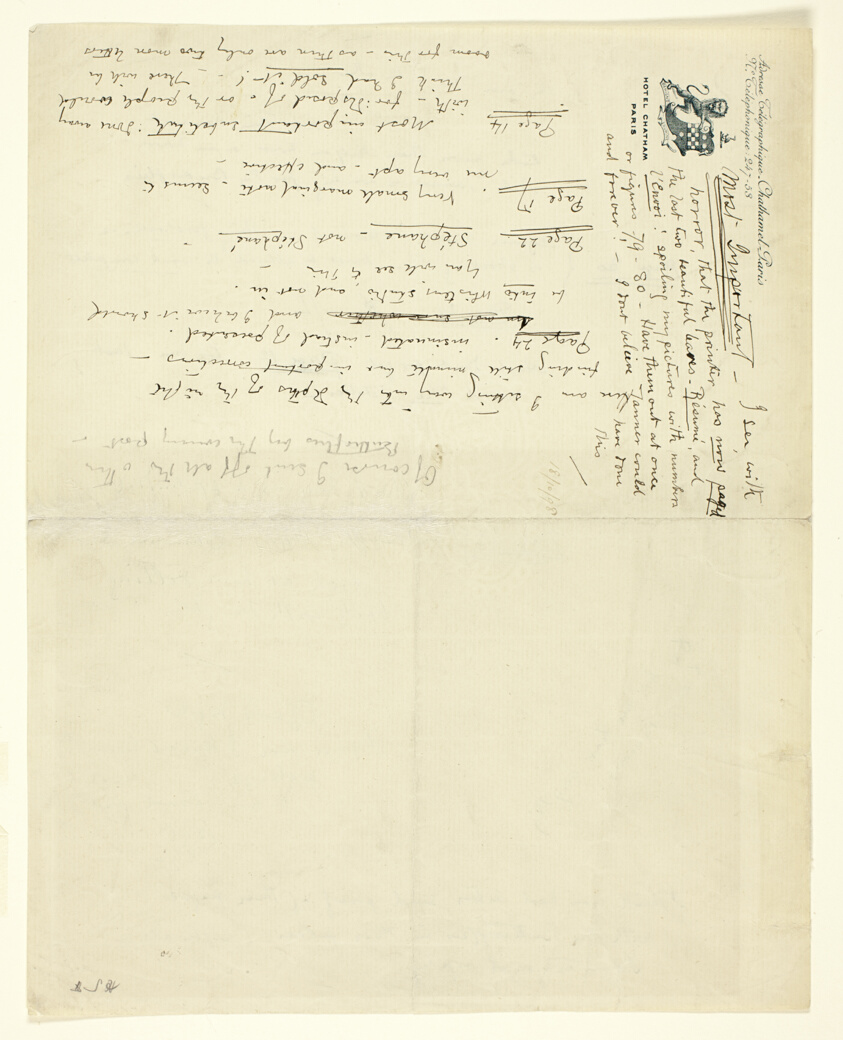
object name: Print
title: Letter to William Heinemann with corrections for Eden versus Whistler: The Baronet and the Butterfly. A Valentine with a Verdict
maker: James McNeill Whistler (American, 1834-1903)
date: October 18, 1898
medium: Pen and brownish black ink, with graphite, on cream laid paper and etching in blue (recto); pen and brownish black ink and graphite on cream laid paper (verso)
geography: United States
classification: print; prints and drawing; paper